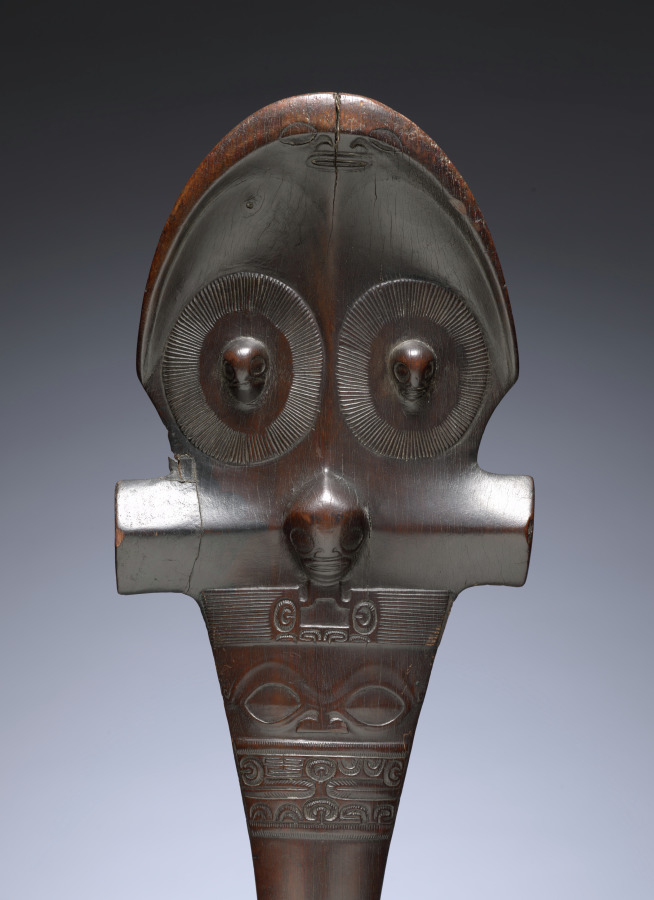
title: War Club ('U'u)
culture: Polynesia, Marquesas Islands, early 19th Century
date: early 1800s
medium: stained ironwood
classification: Sculpture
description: The head of this war club is carved as an abstract face, with small additional faces appearing at the eyes, nose, and forehead. Low-relief patterns encircle the club's neck. Fashioned from dense-grained ironwood (casuarina) or toa wood, the club is quite heavy. Like stilt footrests, war clubs were carved by expert artists (tahuna) and cured in the mud of a taro patch. The glossy finish is the result of regular rubbing and polishing with scented coconut oil. Similar war clubs were seen and recorded by the crew of Captain Cook's second voyage to the South Seas in 1772-75.